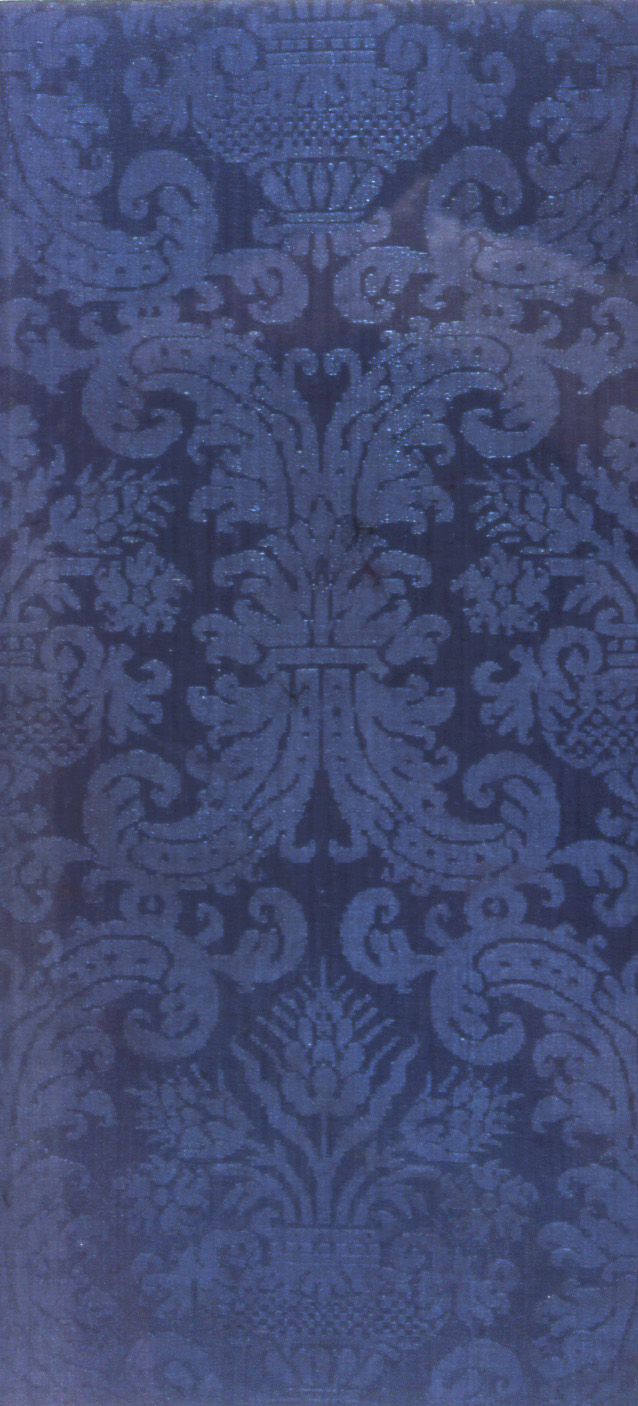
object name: Textile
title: Fragment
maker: Italy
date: 1575/1725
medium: Silk, satin damask weave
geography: Italy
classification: textile; weaving